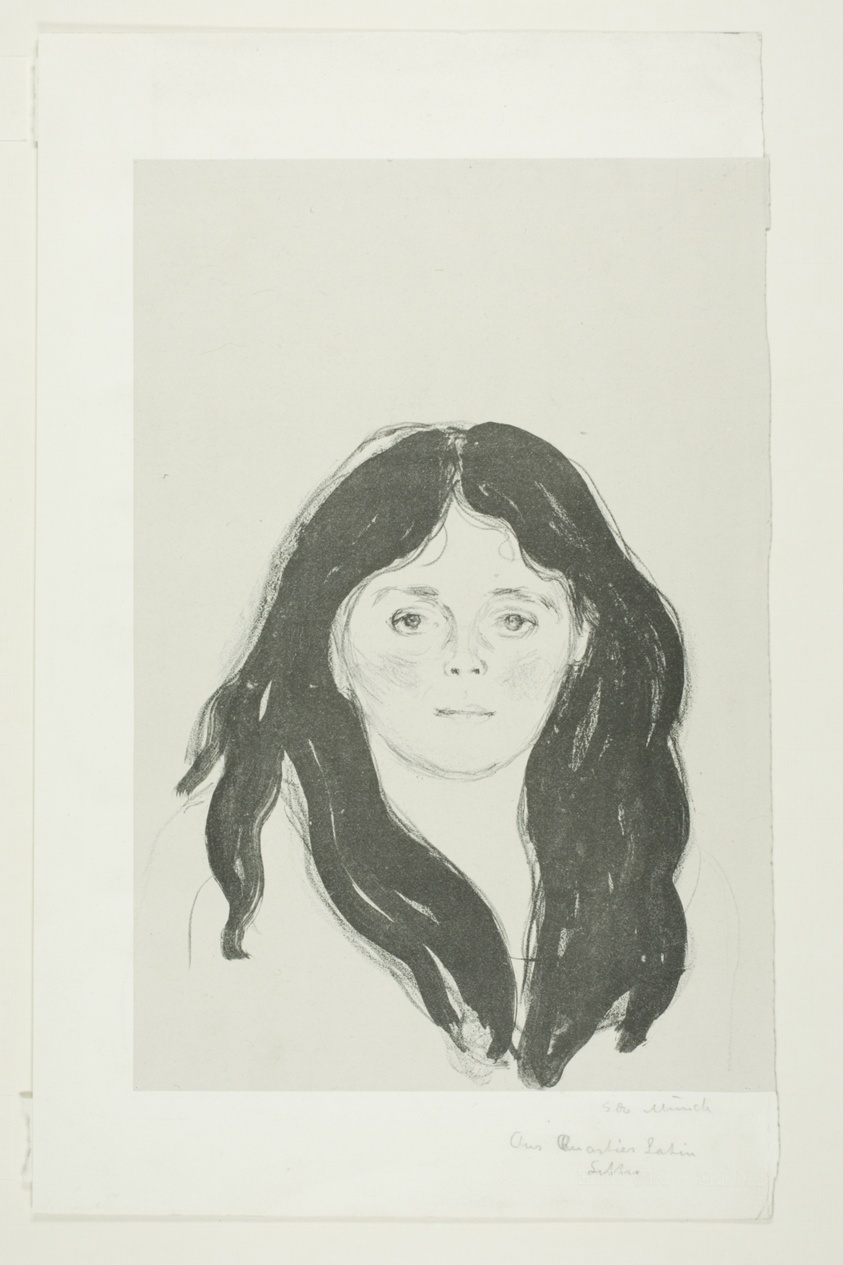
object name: Print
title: Young Woman from the Latin Quarter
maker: Edvard Munch (Norwegian, 1863-1944); printed by Lemercier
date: 1897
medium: Lithograph with tusche on gray wove paper laid down on white wove paper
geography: Norway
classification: lithograph; print; prints and drawing